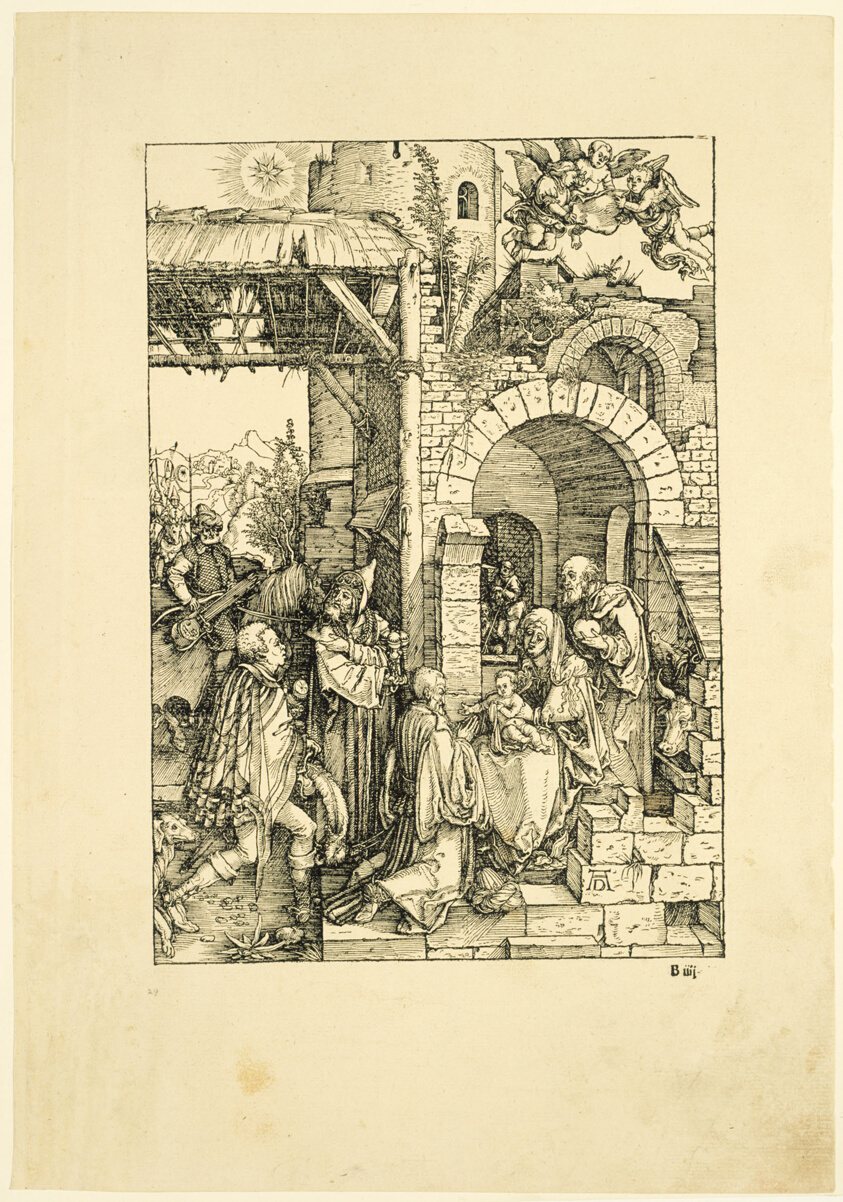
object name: Print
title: The Adoration of the Magi, from The Life of the Virgin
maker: Albrecht Dürer (German, 1471-1528)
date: c. 1503, published 1511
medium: Woodcut in black on tan laid paper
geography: Germany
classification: woodcut; print; prints and drawing; paper